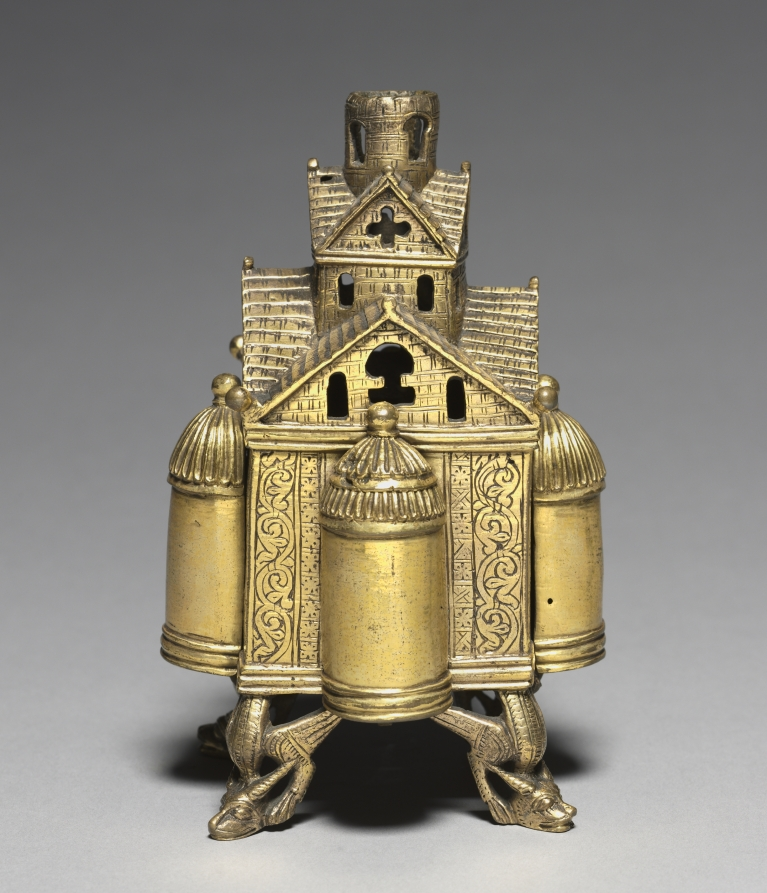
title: Incense Burner and Stand for an Altar Cross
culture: Germany, Lower Saxony, Hildesheim?, Romanesque period, 12th century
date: 1150–75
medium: bronze: cast, gilded, engraved, and chased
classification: Metalwork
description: Supported by dragon-shaped feet on its corners, this unusual object is fashioned like a small, centralized church with gabled roofs, a lantern crowned by a turret, and four semi-circular apses. Traces of soot on the interior walls of a nearly identical object in the Kunstgewerbemuseum in Berlin indicate that these objects once served as incense burners. The objects’ design with an open turret in the center of the roof further suggests that they may have doubled as stands for altar crosses. The fact that both objects formerly belonged to the Bouvier Collection in Amiens may be taken as an indication that they were made as a pair in the same 12th-century workshop.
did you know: This object may been have created for a traveling court with its entourage to use for Catholic Mass, where incense could be used in an easily transportable vessel.